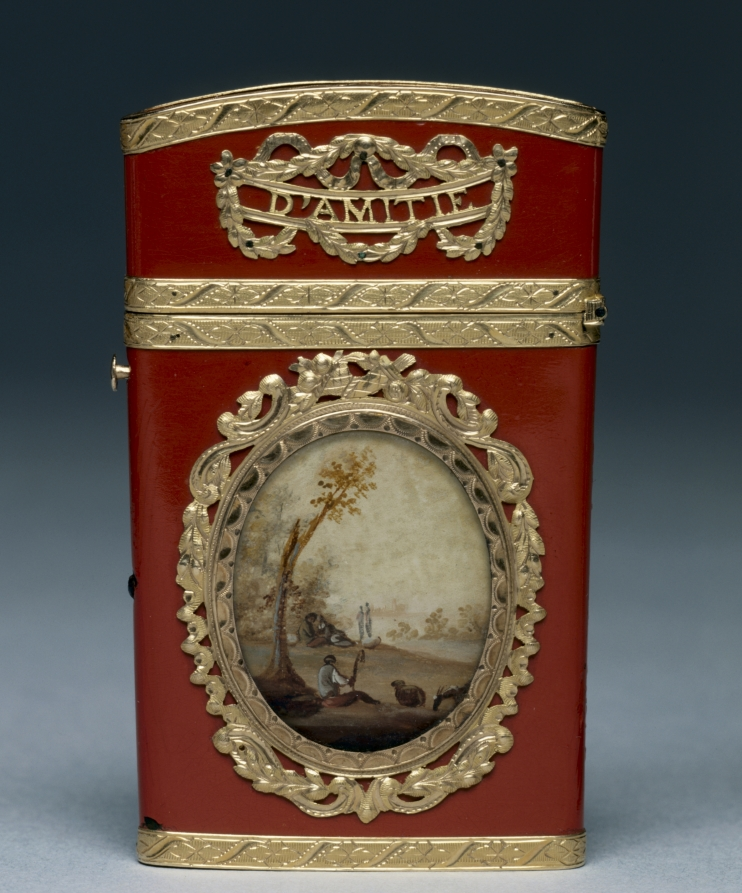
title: Carnet de Bal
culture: France, 18th Century (style of Louis XVI)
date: 1774–1775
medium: enamel on steel (?), gold mounts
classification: Miscellaneous